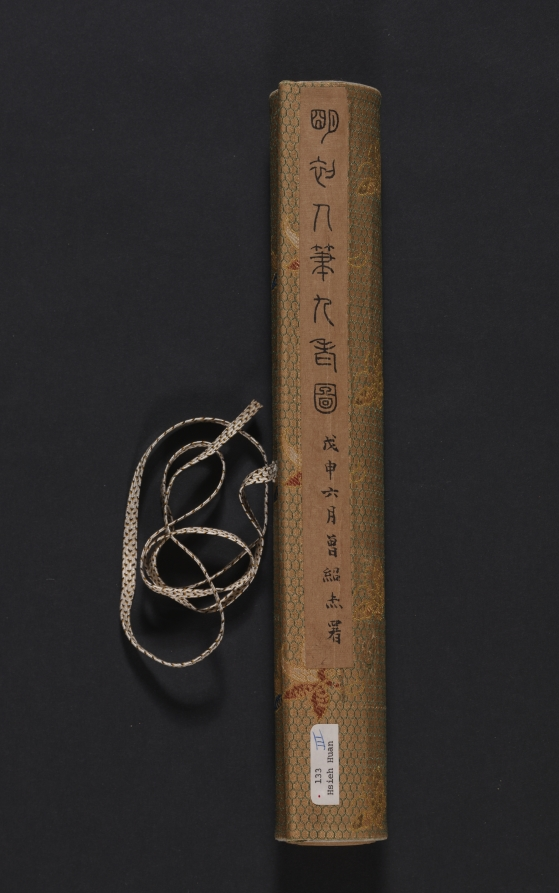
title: The Nine Elders of the Mountain of Fragrance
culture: China, Ming dynasty (1368–1644)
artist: attributed to Xie Huan (Chinese, c. 1370-c.1450)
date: 1426–52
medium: handscroll, ink and color on silk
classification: Painting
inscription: 4 seals: 2 of Xiang Yuanbian 項元汴 (1525–1590); 1 of the Qianlong Emperor (r. 1736-95); 1 of C. C. Wang 王季遷 (1907–2003)